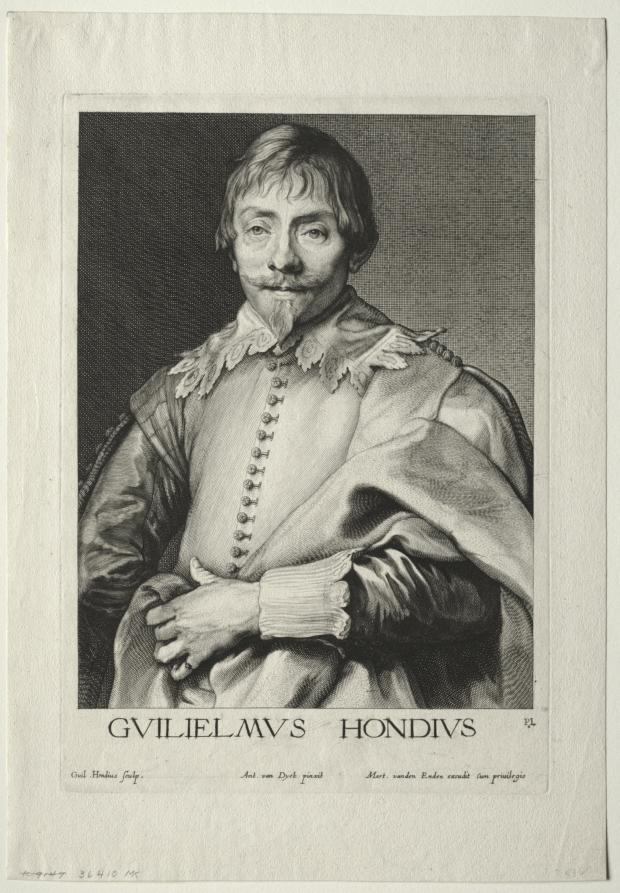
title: Willem Hondius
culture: Netherlands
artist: Willem Hondius (Dutch, c. 1597-c. 1660)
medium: etching and engraving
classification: Print